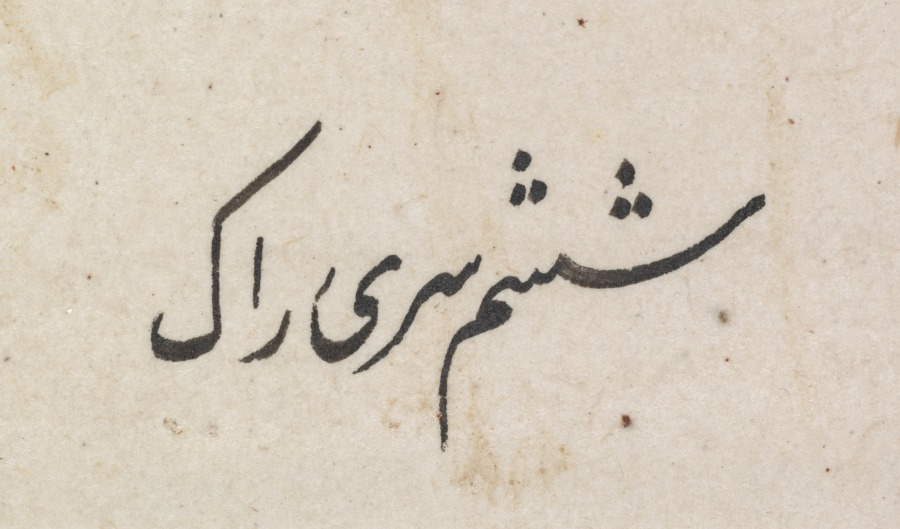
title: Shri Raga: An Illustration from a Ragamala Series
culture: India, Mughal, 18th century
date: c. 1740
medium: Gum tempera and gold on paper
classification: Painting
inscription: Inscription at top, Persian numerals: 31; Persian inscriptions on verso, in nasta‘liq script: 31 Sixth, Shri Raga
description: The verse associated with Shri Raga corresponds closely with this scene: His body, bluish in hue, is marvelously built. He is always graced with the company of auspicious Shri Lakshmi. He sits on a throne of gold, and before him Narada sits playing on his vina. He has decorated himself with garlands of flowers, and also with ornaments set with jewels. Shri raga is thus conceived in sentiment, of whom all learned men sing praises. The horse-headed figure claps his hands and accompanies the sage, wearing saffron garments and playing on the stringed instrument called a vina. He may be derived from the courtly commander of Indra, seen in the Jain manuscripts. Poppies bloom in the formal garden below the pure white terrace, and they are echoed by the oranges set on the windows of the house at the upper right.